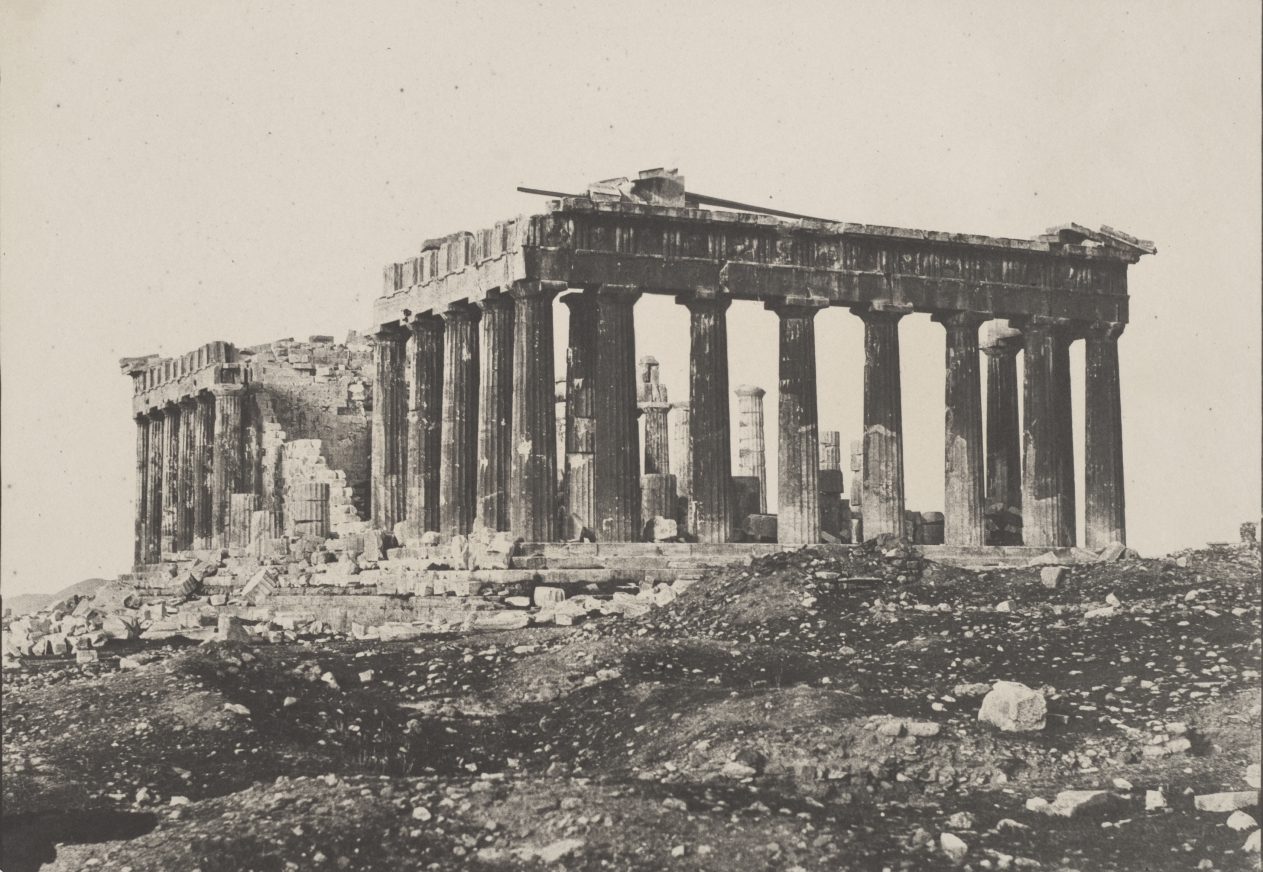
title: Parthenon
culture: France, 19th century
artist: Eugène Piot (French, 1812–1891)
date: 1852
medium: salted paper print from waxed paper negative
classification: Photograph